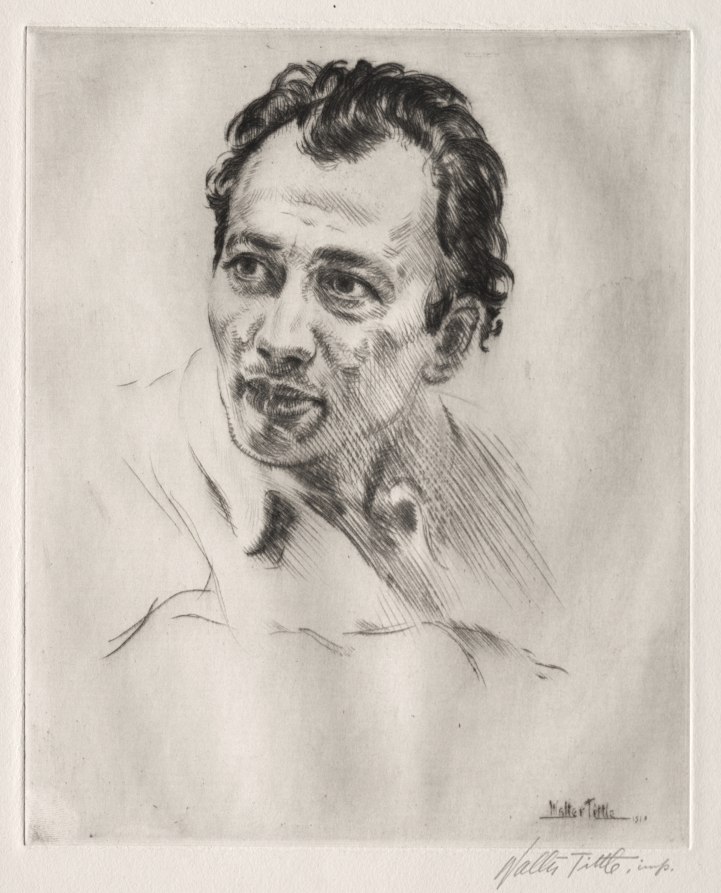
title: Henri Caro-Delvaille, No. 2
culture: America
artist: Walter Tittle (American, 1883–1966)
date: 1910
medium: drypoint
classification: Print